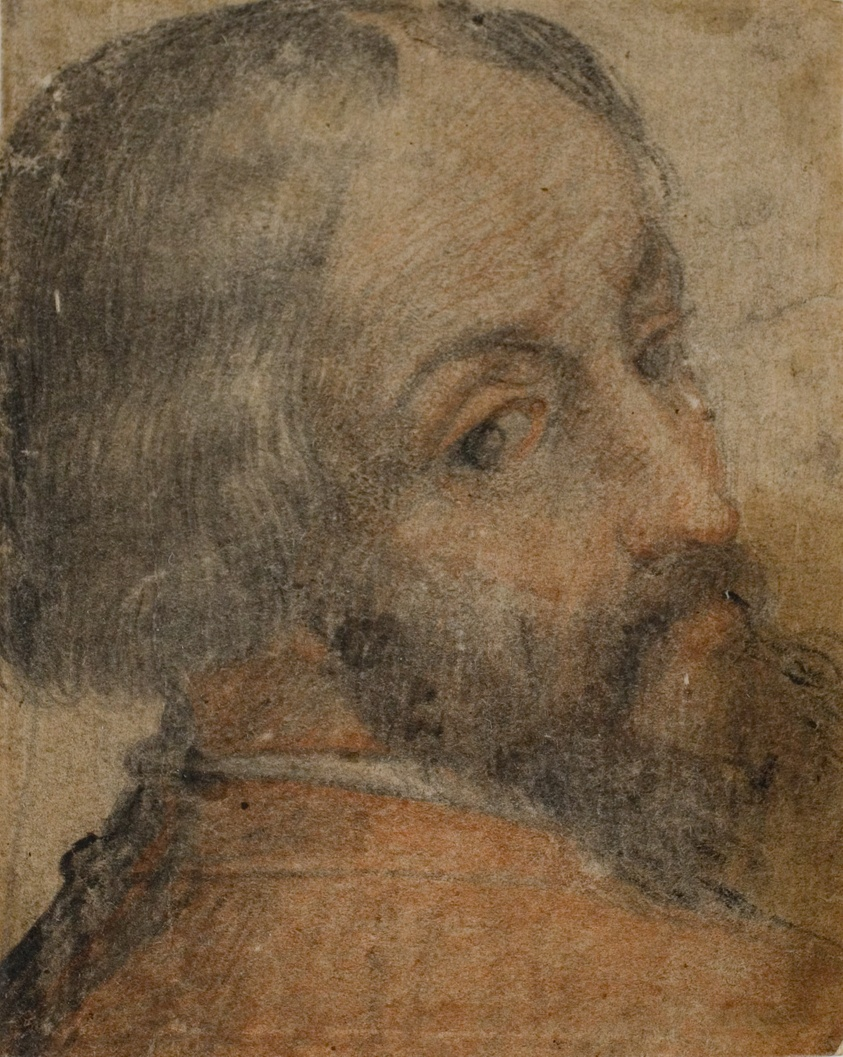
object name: Drawing and Watercolor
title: Portrait of Bearded Man (Lodovico Ariosto?)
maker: Italian; Mid-16th Century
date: 1550/59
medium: Red and black chalk on cream laid paper, laid down on cream laid paper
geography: Italy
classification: chalk; drawings (visual works); prints and drawing